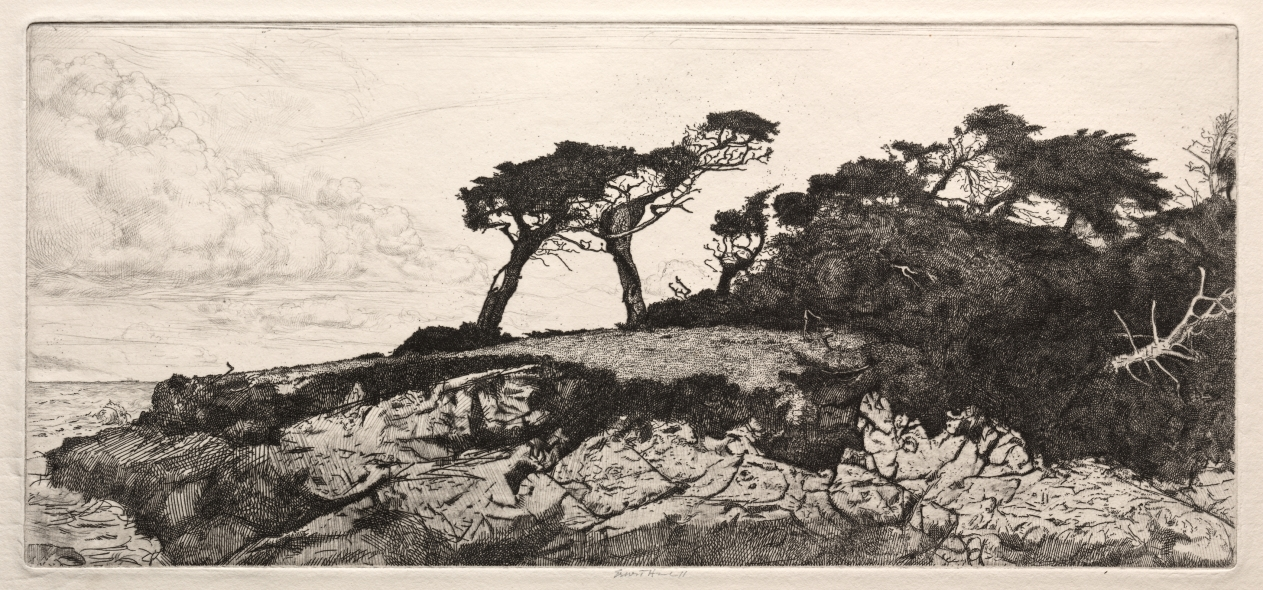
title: The Ostrich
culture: America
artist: Ernest Haskell (American, 1876–1925)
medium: etching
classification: Print